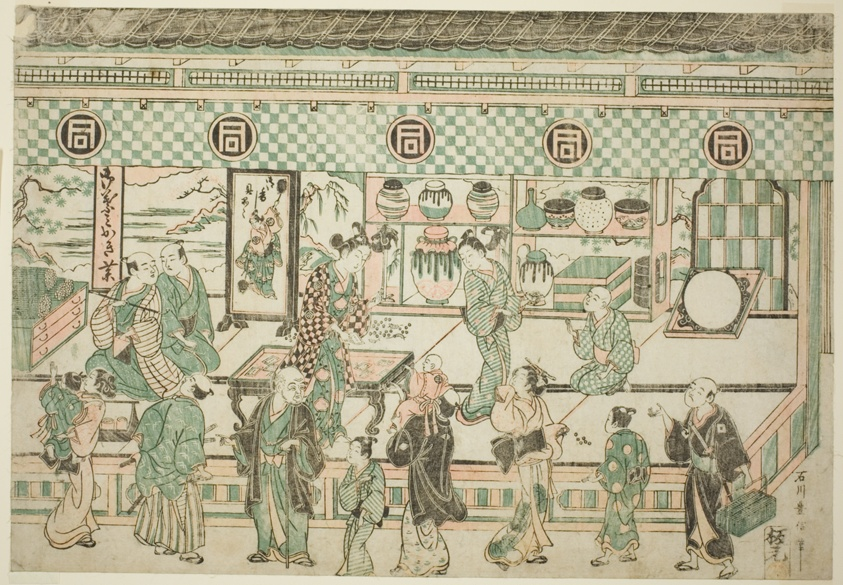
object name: Print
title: The Shop of Sanogawa Ichimatsu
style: Japanese (culture or style)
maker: Ishikawa Toyonobu (Japanese, 1711-1785)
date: c. 1743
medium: Color woodblock print; oban yoko-e, benizuri-e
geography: Japan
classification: woodblock print; print; asian art